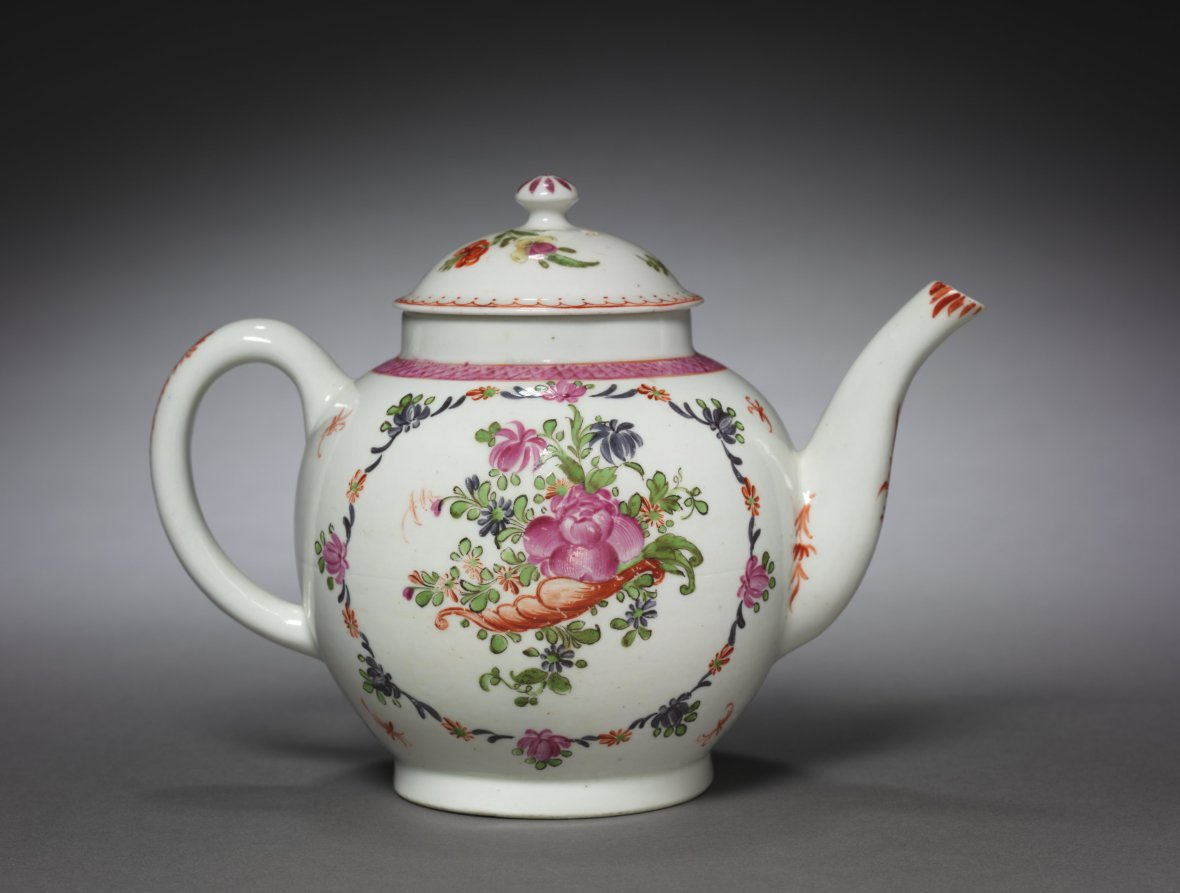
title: Teapot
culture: Staffordshire, England, late 18th century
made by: New Hall Porcelain Factory (British)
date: c. 1782–1790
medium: porcelain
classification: Ceramic